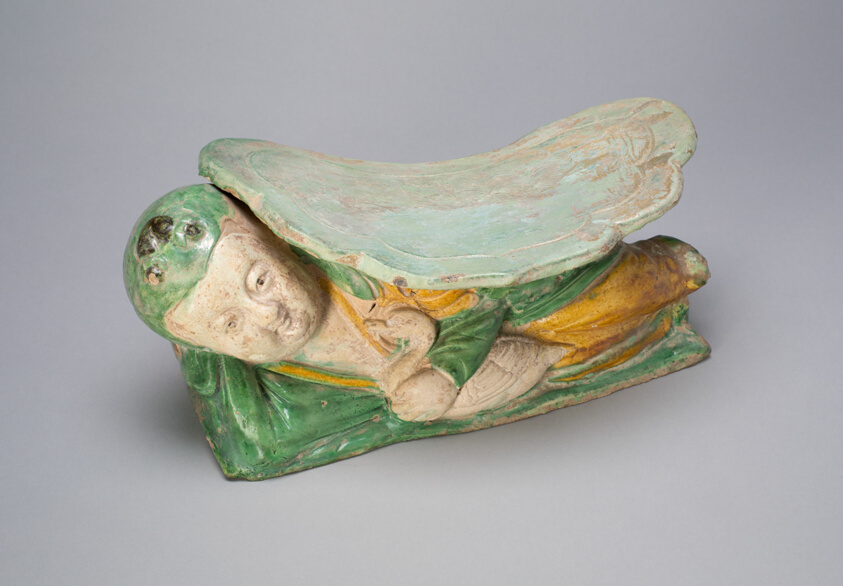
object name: Sculpture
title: Pillow with Boy Supporting a Cloud-Shaped Headdrest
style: Chinese (culture or style)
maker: China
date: Jin dynasty (1115–1234)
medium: Cizhou-type ware; slip-coated and glazed earthernware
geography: China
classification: earthenware; ceramics; asian art; sculpture